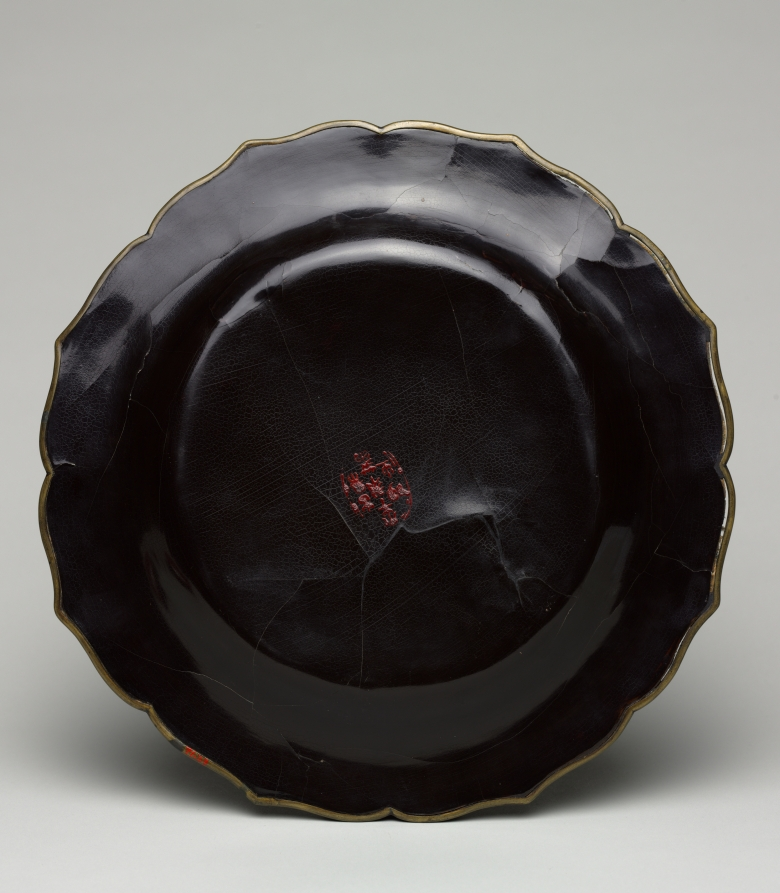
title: Foliate Dish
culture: China, Southern Song Dynasty (1127-1279) - Yuan Dynasty (1271-1368)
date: 1200s–1300s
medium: lacquer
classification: Lacquer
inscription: Red lacquer seal on base of plate.